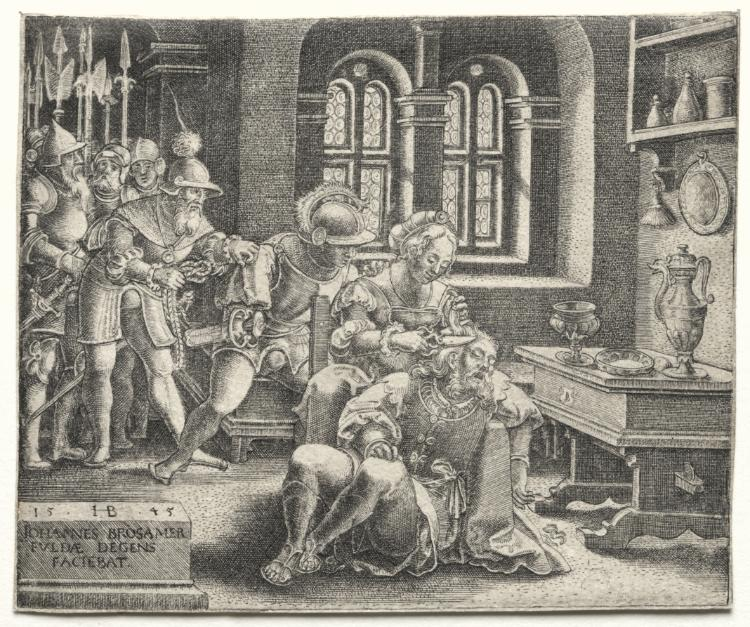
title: Samson and Delilah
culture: Germany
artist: Hans Brosamer (German, c. 1500–1554)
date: 1545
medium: engraving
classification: Print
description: Samson was a man of immense strength and a Nazarite, an Israelite who took a pious oath not to cut his hair or drink alcohol. Bribed by the Philistines (enemies of the Israelites), Delilah—Samson’s lover—cut his hair after discovering that it was the source of his strength. In Hans Brosamer’s rendition, Samson has fallen asleep on Delilah’s lap as she cuts his hair while the Philistines enter. A large chalice and ewer nearby reveal the role of wine in his slumber. Hans Burgkmair I similarly emphasized the importance of wine to the plot with a single beaker. The story was popular in Protestant Northern Europe, where it was understood as a cautionary tale about the dangers of temptation and neglecting one’s spiritual commitments.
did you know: Samson's sandals may be intended to signal his status as an ancient warrior, but with the exception of Samson's footwear, Samson and Delilah are dressed like 16th-century Europeans.